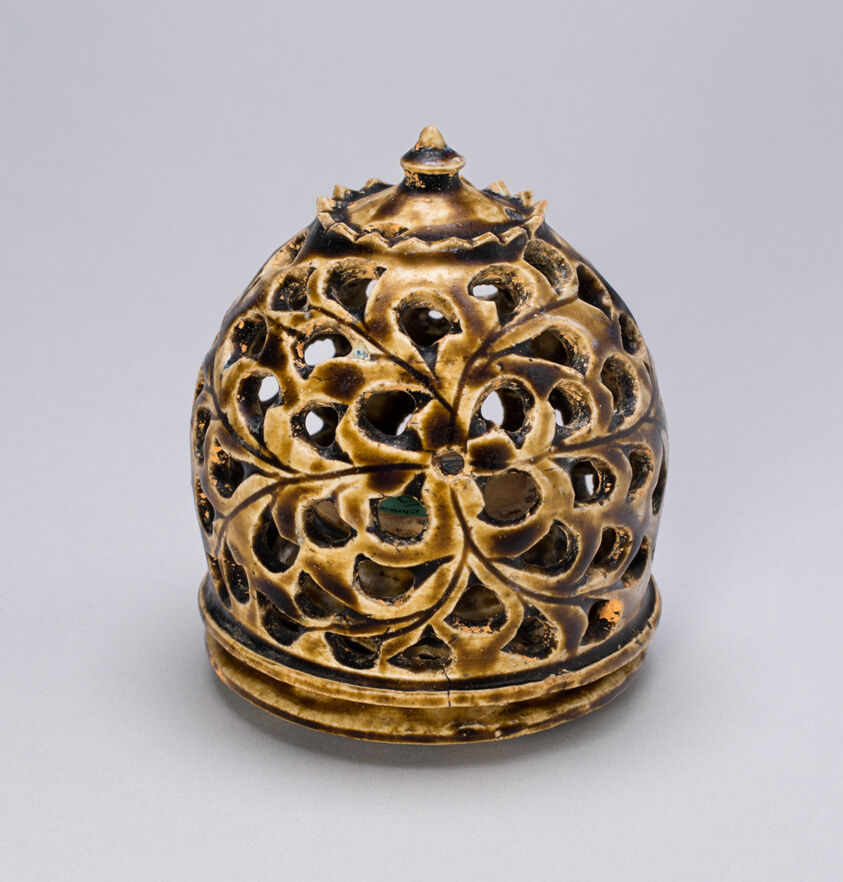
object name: Vessel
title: Teardrop-Shaped Incense Burner (Cintanmani)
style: Chinese (culture or style)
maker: China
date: Southern Song dynasty (1127–1279)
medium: Jizhou-type ware; stoneware with olive-brown glaze and openwork decoration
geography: China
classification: ceramics; vessel